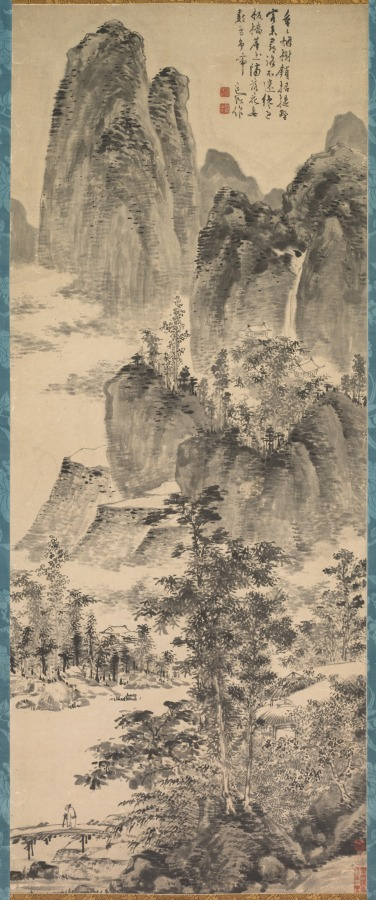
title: Looking for a Monastery in the Misty Mountains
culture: China, Ming dynasty (1368–1644)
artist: Chen Chun (Chinese, 1483–1544)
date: 1500–1544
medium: hanging scroll, ink on paper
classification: Painting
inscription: Artist's inscription, signature, and 2 seals: Row after row of misty trees envelop the Buddhist Monastery./ But the rustic who comes to find it will not lose his way./ Just across the wooden bridge, the dusty world is cut off;/ Among the countless falling petals, birds are singing confusedly. Daofu 道複 composed [this]. [seals] Fufu shi 復甫; Baiyang shanren 白陽山人. trans. WKH/LYSL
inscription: 3 additional unidentified seals.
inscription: 1 additional unidentified seal on the back of the mounting.